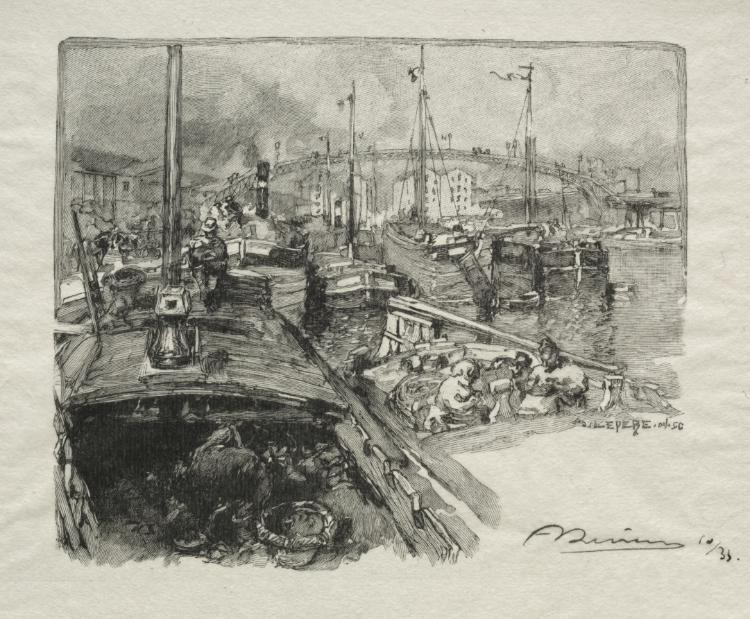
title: Le Bassin de la Villette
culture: France, 19th-20th century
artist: Auguste Louis Lepère (French, 1849–1918)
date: 1890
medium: wood engraving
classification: Print